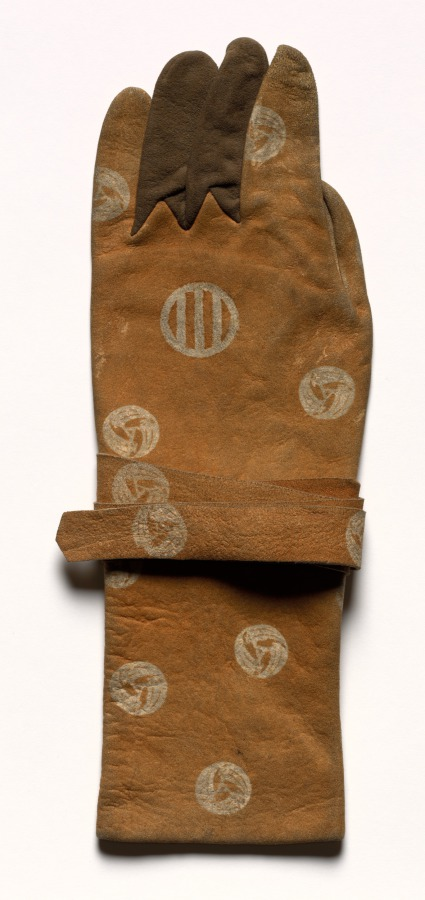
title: Archer's Glove (left)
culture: Japan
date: 1800s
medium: chamois leather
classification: Garment